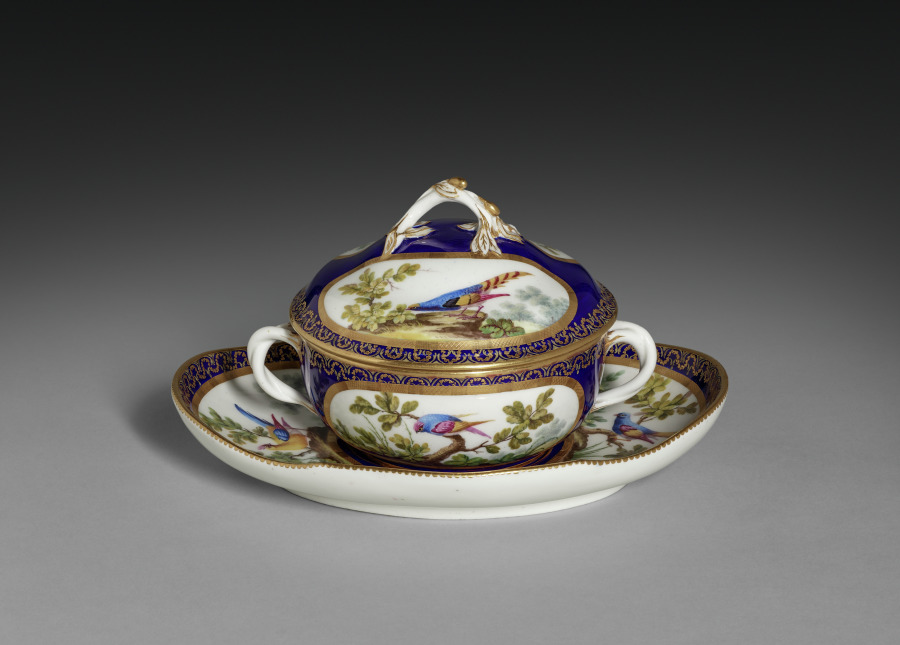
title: Covered Broth Bowl and Stand (Écuelle ronde et plateau ovale)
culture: France, Sèvres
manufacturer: Sèvres Porcelain Factory (French, est. 1756)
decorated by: François-Joseph Aloncle (French)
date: 1772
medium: soft-paste porcelain with enamel and gilt decoration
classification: Ceramic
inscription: Interlaced Ls with date letter 'T'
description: Birds were collected in all forms during the 18th century following an increased European interest in natural history. The birds on this bowl and stand were painted by François-Joseph Aloncle, one of the Sèvres porcelain factory’s principal bird painters. Small, two handled bowls like this one would hold broths or soups consumed by an individual during the toilette, a ritual of washing and dressing practiced by the 18th-century French elite.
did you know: Two different colors of gold decorate these objects’ borders, exemplifying more complex forms of gilding introduced in the 1770s.